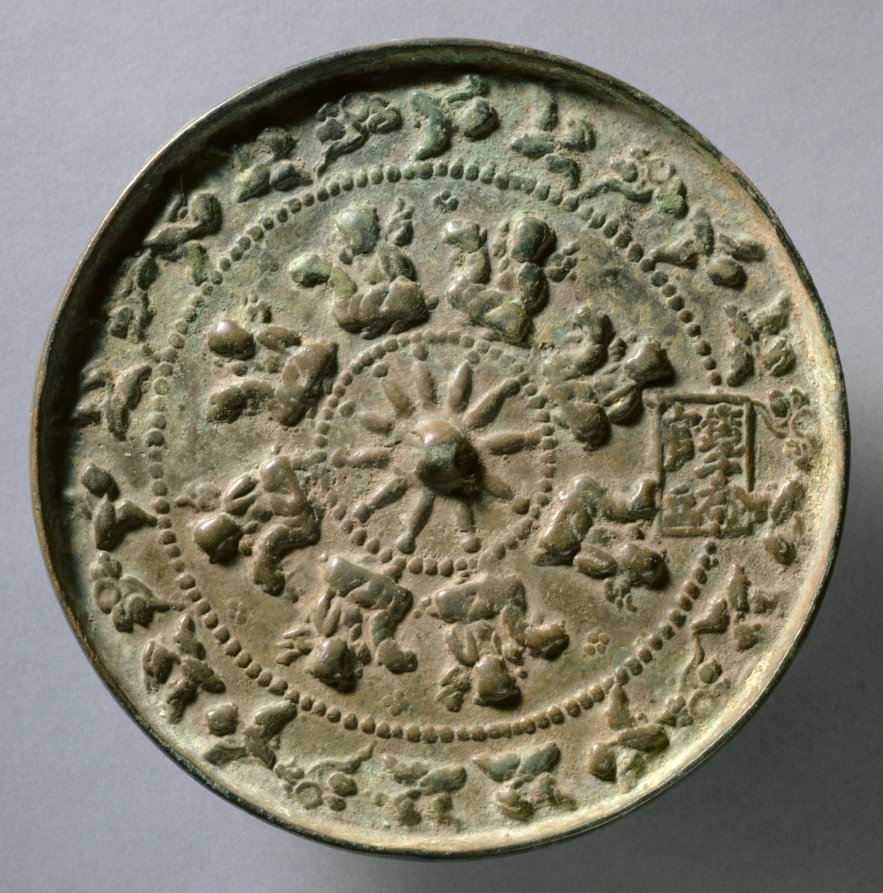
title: Mirror with Wheel Spokes and Riding Boys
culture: China, Jin dynasty (1115-1234)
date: c. 1196–1234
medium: bronze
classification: Metalwork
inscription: 官立鏡子局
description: Inscription: Official Bureau of Mirrors